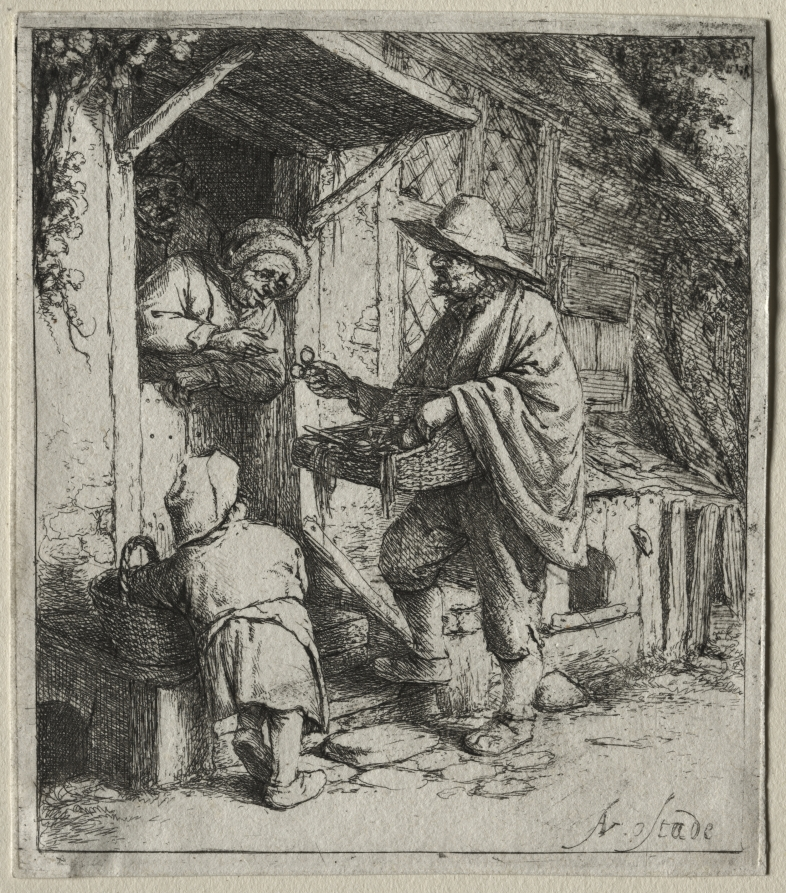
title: The Spectacle Seller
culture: Netherlands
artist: Adriaen van Ostade (Dutch, 1610–1684)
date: c. 1647–52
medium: etching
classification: Print